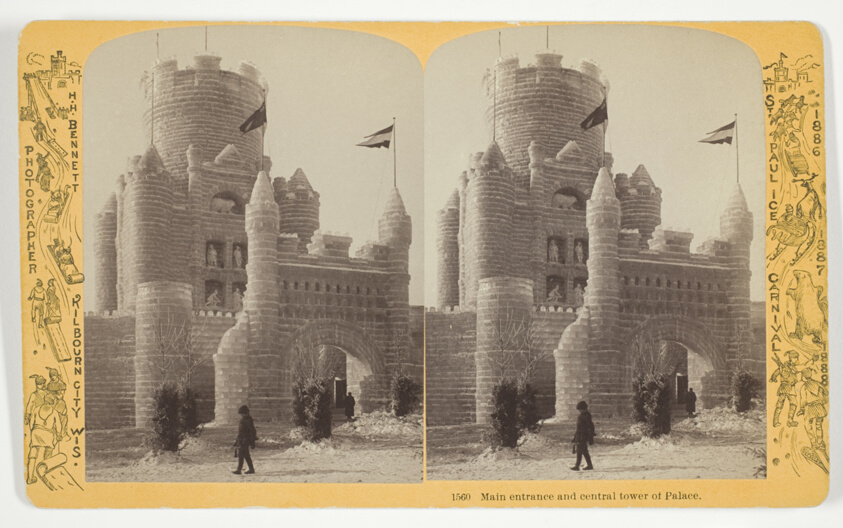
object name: Photograph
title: Main entrance and central tower of Palace, No. 1560 from the series "St. Paul Ice Carnival"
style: 19th century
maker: Henry Hamilton Bennett (American, born Canada, 1843-1908)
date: 1886/88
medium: Albumen print, stereo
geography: Wisconsin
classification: photography; photograph; albumen silver print; stereograph (albumen)